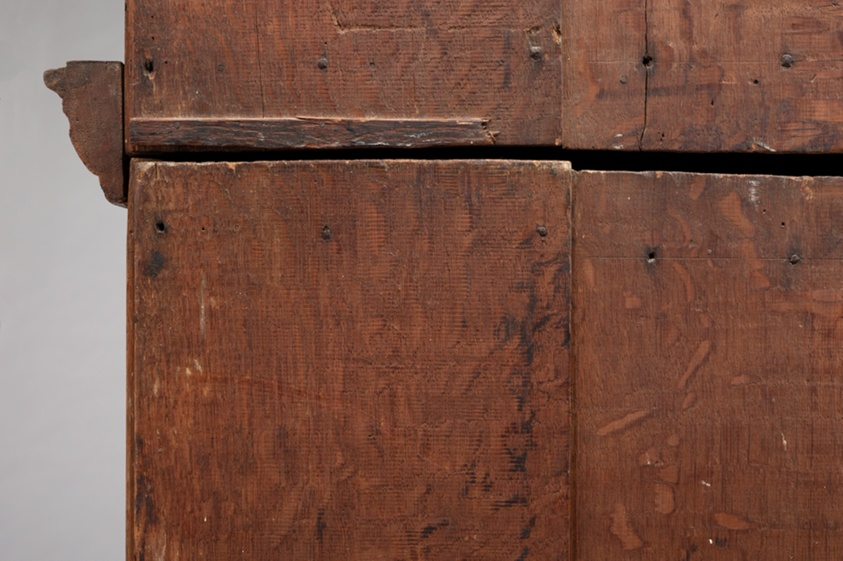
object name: Furniture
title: Linen Cupboard (Kast)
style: Baroque, Mannerism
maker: The Netherlands, probably Amsterdam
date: 1630/50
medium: Oak, pearwood, hardwood, paint, iron, and brass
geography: Netherlands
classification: furniture; decorative arts; functional object; furnishings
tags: lions, animals, architecture